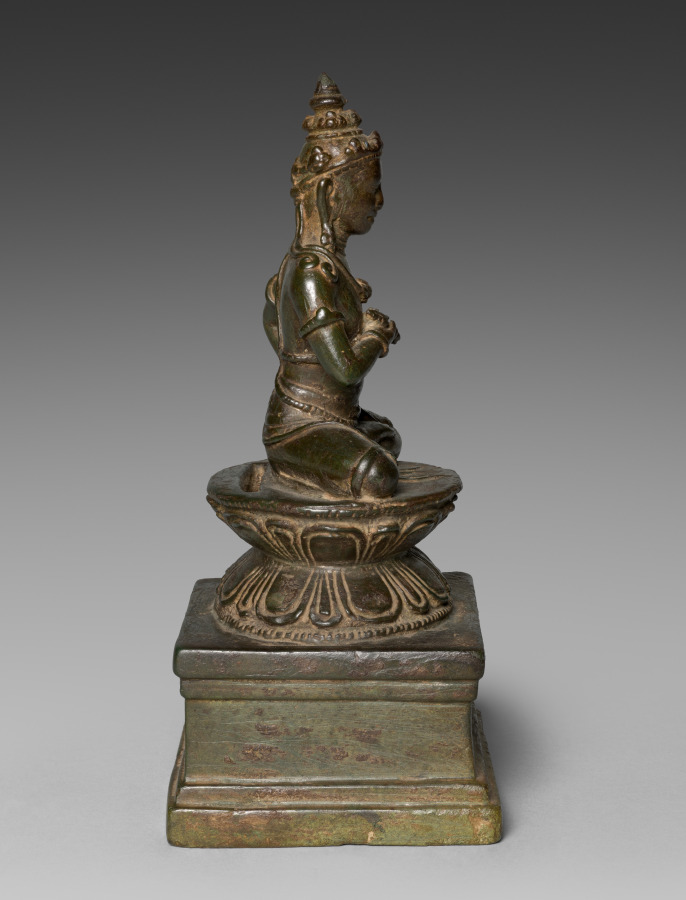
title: Vajrasattva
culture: Cambodia, style of Angkor Thom, 12th-13th century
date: 1100s–1200s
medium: bronze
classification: Sculpture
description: Vajrasattva is a Buddhist being of enlightenment who holds the vajra, or thunderbolt, in his right hand and a bell in his left. The vajra and bell are the basic implements used in tantric rituals that were popular under Jayavarman VII and practiced at Banteay Chhmar. Tantra is a form of Buddhism that makes use of rituals and mantras to aid practitioners in reaching their goals quickly, as though with the speed of lightning. Tantric texts and rituals were used frequently in Cambodia, from the 900s onward, but they were especially prominent under Jayavarman VII. This form of Buddhism appears to have been supplanted by other forms after the 1400s. Small bronze images of Vajrasattva may have been brought out from a temple treasury during the performance of Buddhist rituals that followed the instructions in a Sanskrit text, brought to Cambodia from India, called the Hevajra-tantra. In that text Vajrasattva manifests at key moments in the rituals.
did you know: From the back of the crown hang cords, which drape over the shoulders. The same type of cords hang from the back of the belt, coiling over the legs symmetrically on either side.